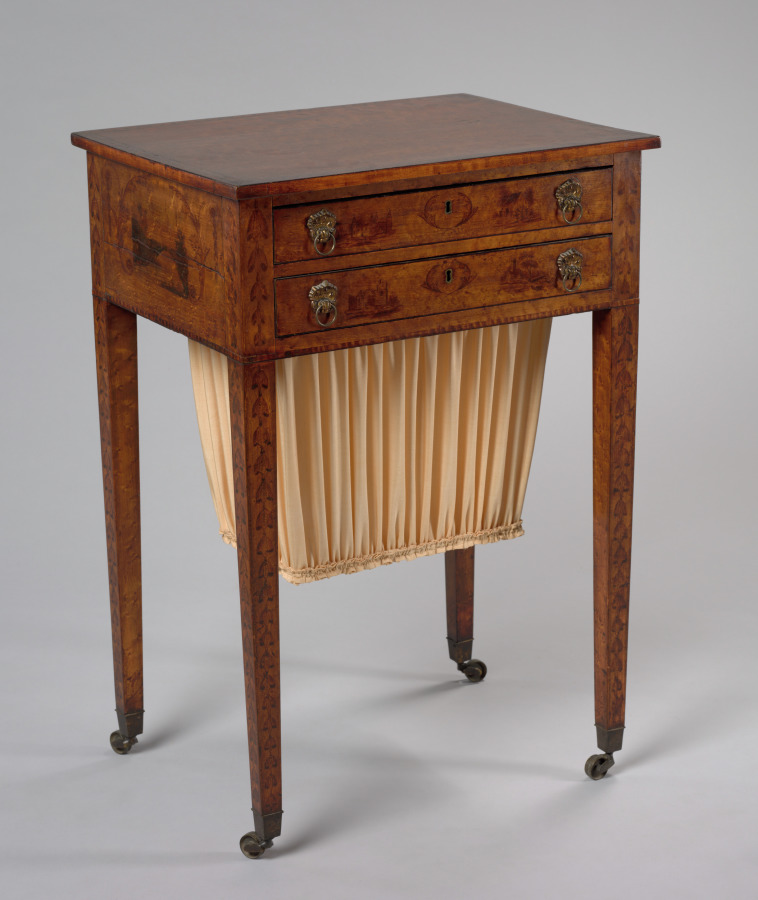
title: Work Table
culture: America, Massachusetts, Boston, 19th century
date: 1800–1825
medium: maple, brass hardware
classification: Furniture and woodwork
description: Needlework typically occupied several hours of a well-to-do woman's day. Worktables are compact, lightweight, and therefore portable. Casters permitted one to move the table around a room and to reposition it easily for sewing or writing. The top drawer of this example was designed to hold writing equipment and contains a writing tablet that could be placed at a convenient slant. The second drawer is divided into compartments for sewing equipment. Needlework was stored in a bag below, accessible by pulling its frame out of one of the table's shorter sides. This simple, small table with its slender, tapered legs is decorated with painted landscapes almost certainly copied from engravings. From about 1800–1825 furniture decoration of this kind was taught in schools for proper young ladies of New England.